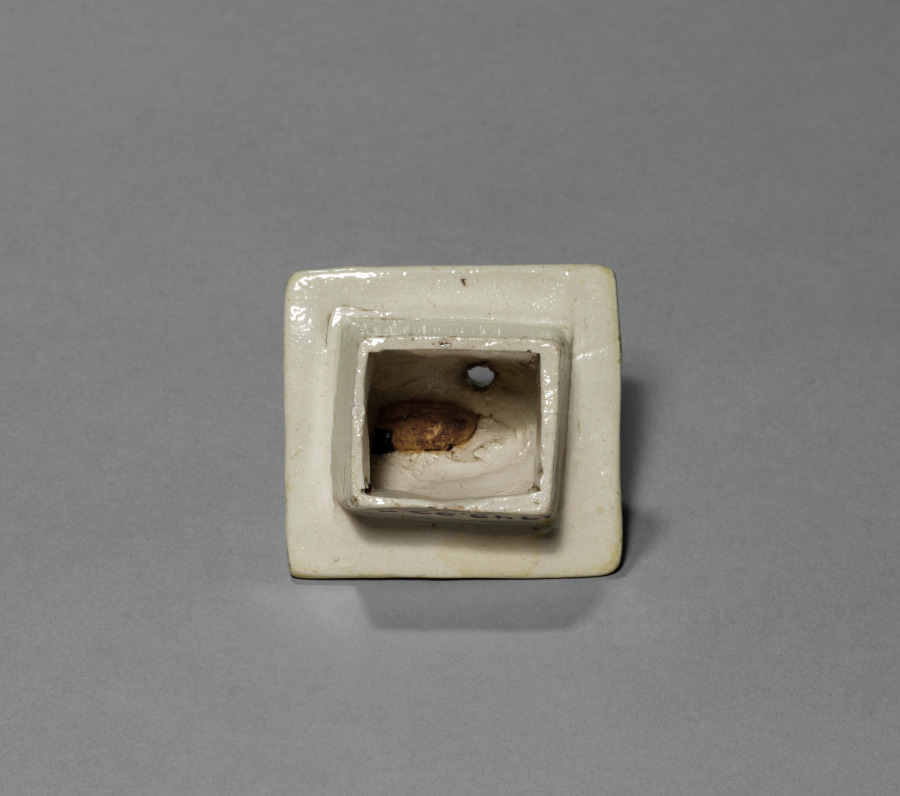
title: Teapot (lid)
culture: England, Staffordshire, 18th century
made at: Staffordshire Factory (British)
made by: Aaron Wood (British)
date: 1740–1750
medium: ceramic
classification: Ceramic